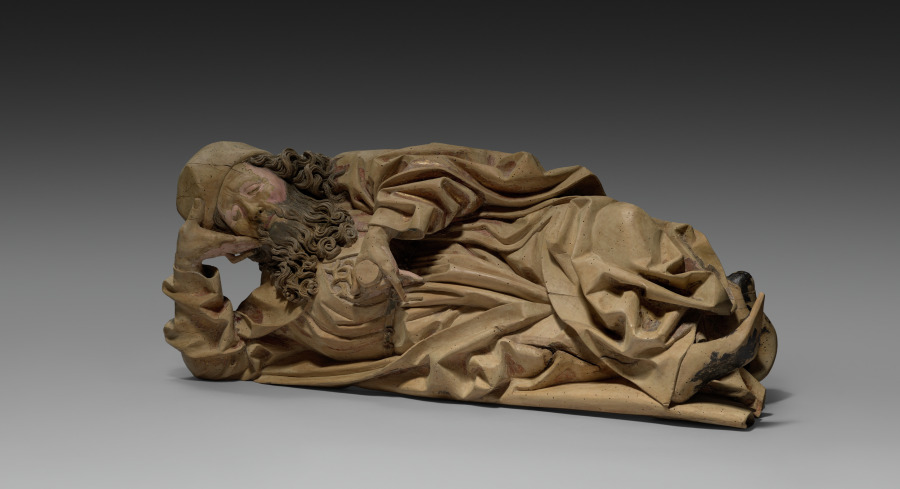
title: Jesse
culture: Germany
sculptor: Veit Stoss (German, c. 1445–1533)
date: c. 1500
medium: Limewood, polychromed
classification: Sculpture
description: The figure shows the sleeping Jesse, the father of David from the Old Testament. As the ancestor of the family tree of Christ, he was depicted in the Middle Ages sleeping as the starting point of the tree, on whose branches the ancestors of Christ are depicted. Mary with the Christ child is always shown at the top. The figure comes from a wooden altarpiece from an unknown church, possibly in Nuremberg, which is now lost. Veit Stoss is one of the most prominent German sculptors around 1500 who was mainly active in Nuremberg (Bavaria, Germany) and Krakow (Poland), also as a painter and engraver.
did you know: The family tree of Christ starts from Jesse, the father of David in the Old Testament.